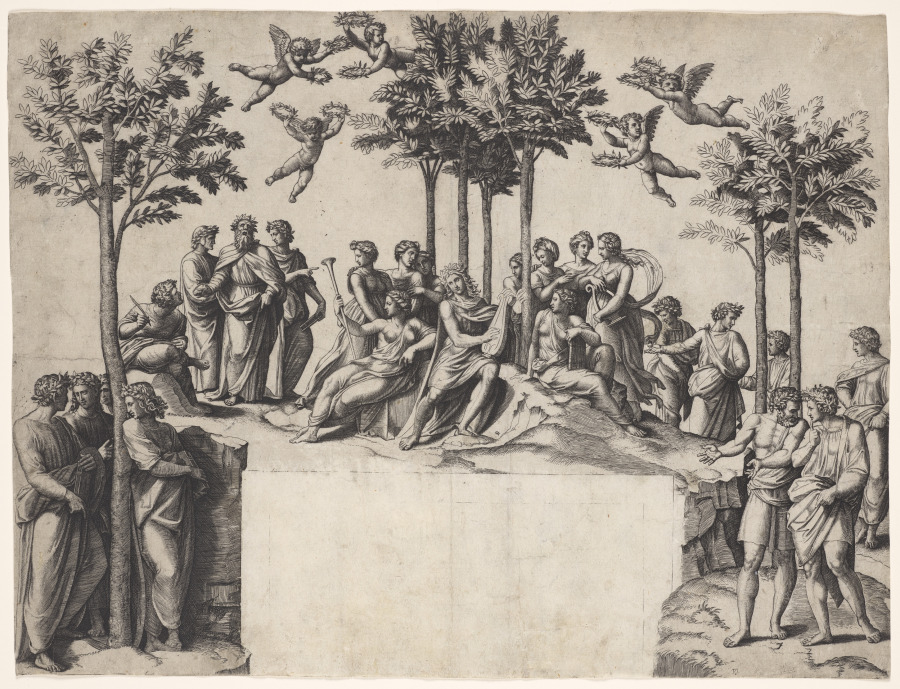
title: Apollo on Parnassus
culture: Italy, 16th century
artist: Marcantonio Raimondi (Italian, 1470/82–1527/34)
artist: after Raphael (Italian, 1483–1520)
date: c. 1517–20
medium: engraving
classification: Print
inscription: verso, lower left, in graphite: TR 13304/3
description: Around 1510, the influential painter Raphael began collaborating with the engraver Raimondi to translate his designs into prints, which allowed his works to reach an international audience. This engraving replicates Raphael’s design for a fresco he painted in the personal apartments of Pope Julius II (1443–1513), showing that devotion to classical ideas reached even the highest levels of religious authority. In addition to Apollo and his muses, Raphael portrayed some of history’s most celebrated poets on the Greek mountain Parnassus. On the left, next to a seated scribe, the ancient Greek poet Homer stands between the Latin poet Virgil (Roman, 70–19 BC) and the late medieval author Dante (Italian, about 1265–1321).